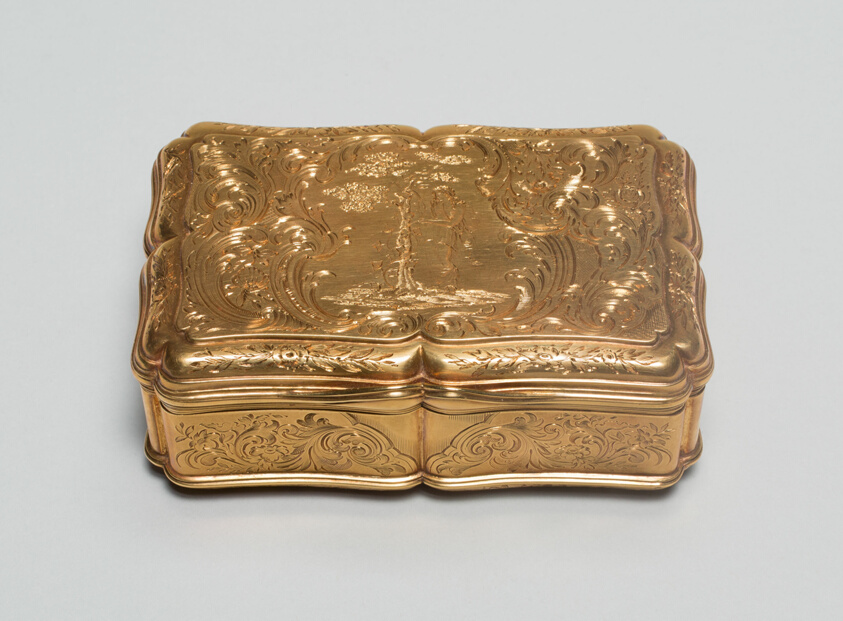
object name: Metalwork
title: Box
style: victorian, european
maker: Rawlins & Sumner; London, England, 19th century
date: 1865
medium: Gold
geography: London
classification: gold; metalwork; european decorative arts